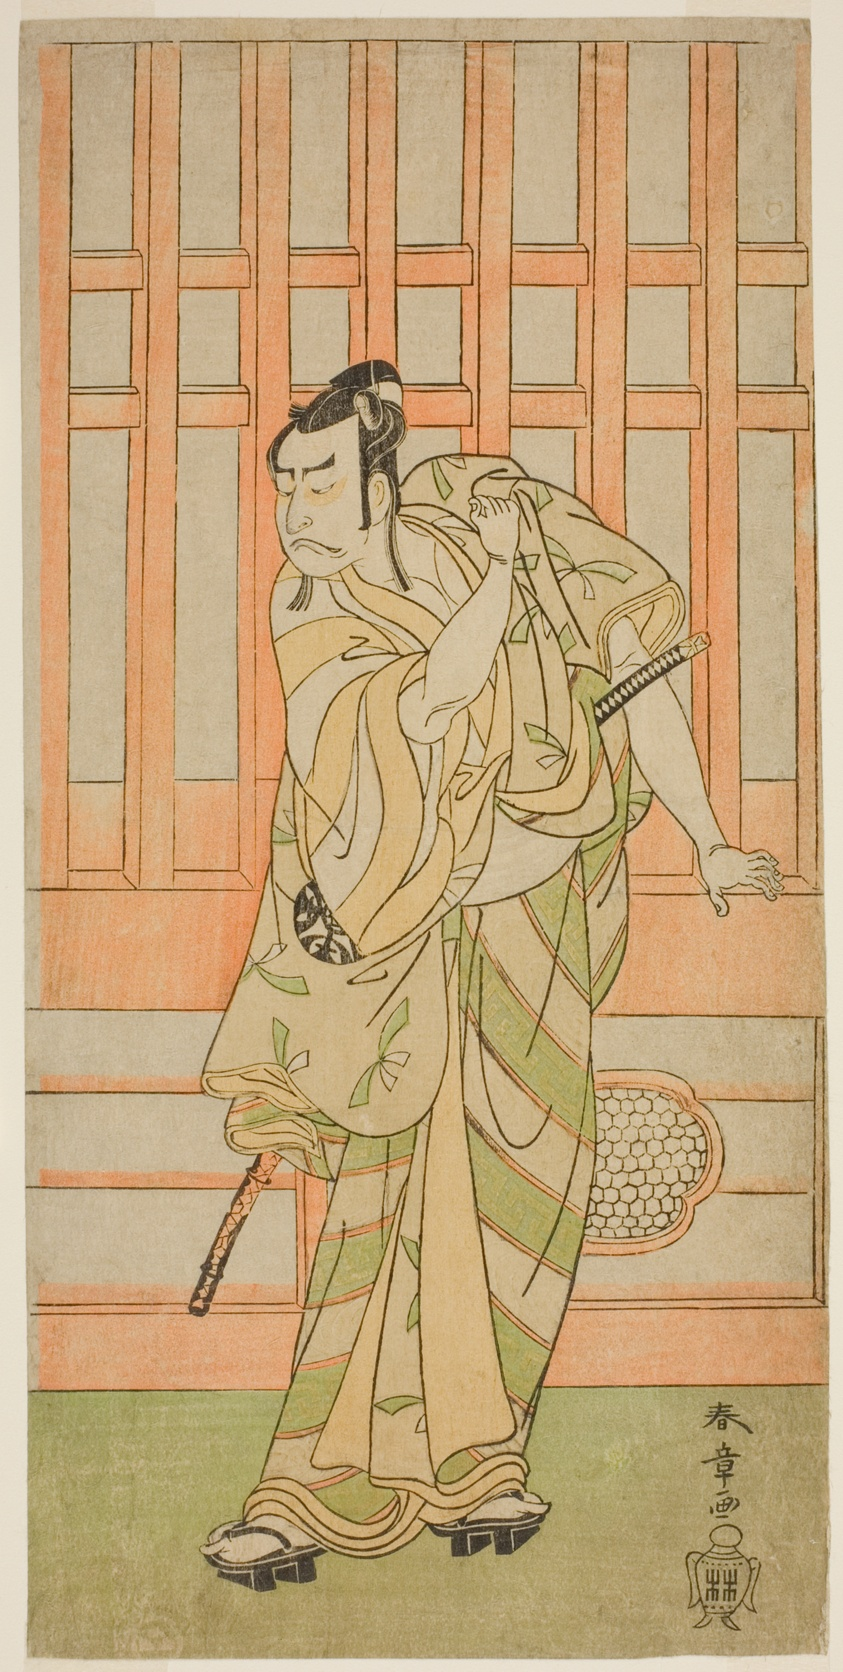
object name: Print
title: The Actor Nakamura Nakazo I as Kudo Saemon Suketsune (?) in the Play Sakai-cho Soga Nendaiki (?), Performed at the Nakamura Theater (?) in the First Month, 1771 (?)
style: Japanese (culture or style)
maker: Katsukawa Shunsho 勝川 春章; Japanese, 1726-1792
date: c. 1771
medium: Color woodblock print; hosoban; from a multisheet composition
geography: Japan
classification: woodblock print; print; asian art